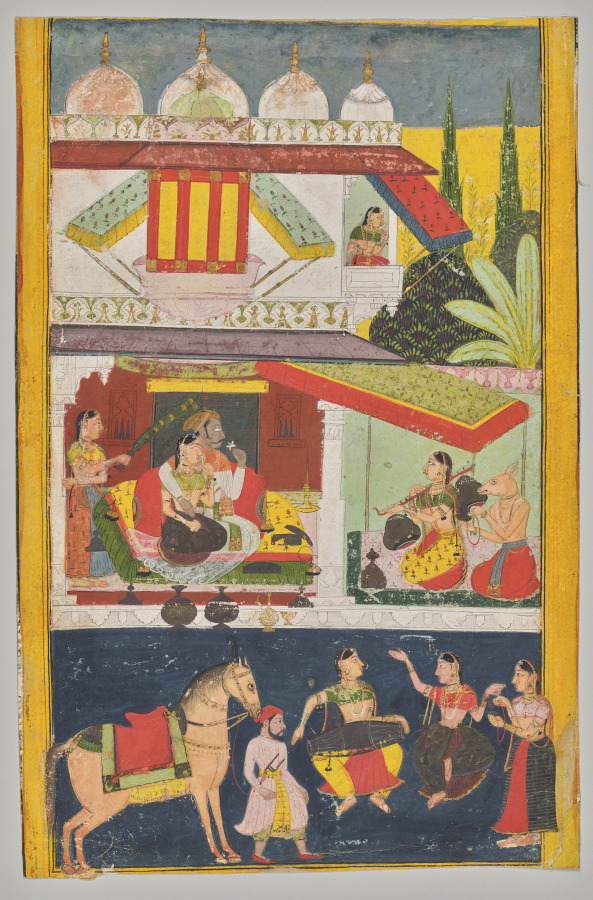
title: Shri Raga, from a Ragamala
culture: Northwestern India, Rajasthan, Rajput Kingdom of Mewar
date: c. 1695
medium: Gum tempera and gold on paper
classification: Painting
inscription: [[verso]] Shri Ragini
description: This painting is from an important series made at a turning point in the history of court painting at the Rajput kingdom of Mewar. For the first time, a royal patron, Amar Singh II (r. 1698–1710), even before his accession to the throne, decided to incorporate Mughal elements into secular art, as seen in the white domed architecture and interest in conveying some sense of spatial depth. Nevertheless, the artist still adheres to the use of horizontal registers and bold planes of color. The codified iconography of Shri Raga involves a royal couple listening to recitations. Shri Raga is described as: "Splendidly enthroned of peerless beauty and lovely as the autumn moon, he sits hearing stories from Narada and Tumburu. By the great sages he is called Shri Raga King." Amar Singh has playfully substituted his own portrait for that of the generic king, and a woman for that of the sage. In music, Shri Raga is associated with the season of autumn and the harvest festivals, here evoked by the dancing female musicians in the lower register.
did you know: The horse-headed musician playing the cymbals is a celestial being (gandharva) famed for his sweet voice.